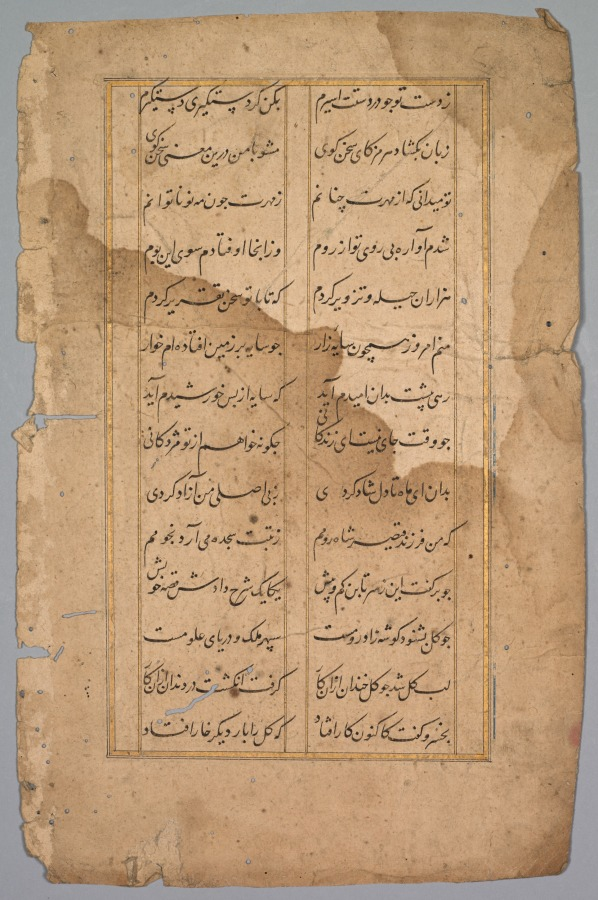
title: Page with Panel with Two Columns of Persian Writing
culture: India, Mughal Dynasty (1526-1756)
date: 18th century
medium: ink on paper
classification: Manuscript